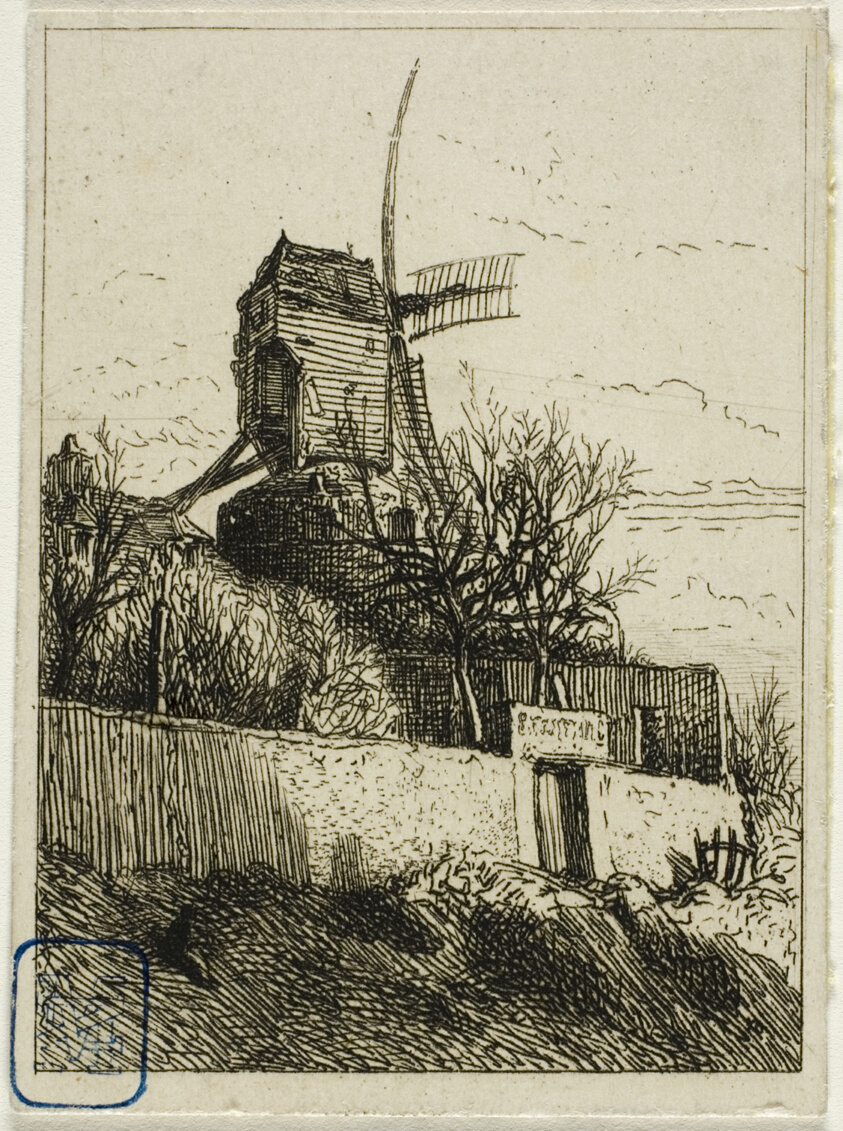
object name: Print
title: Little Mill at Montmartre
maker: Charles Émile Jacque (French, 1813-1894)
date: 1842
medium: Etching on ivory wove paper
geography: France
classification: etching; print; prints and drawing